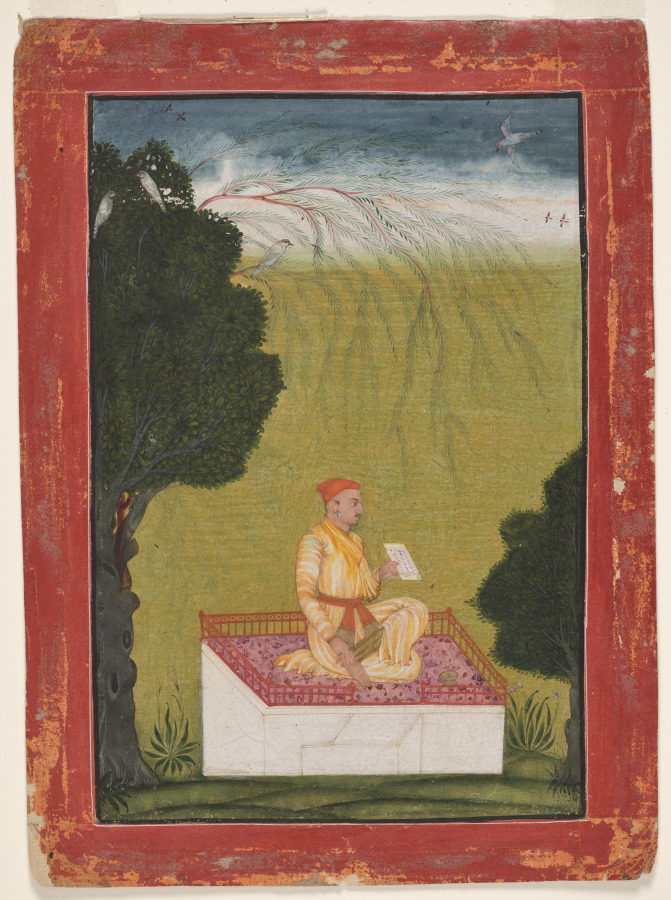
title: Raja Dilip Singh of Guler on a dais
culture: Northern India, Pahari kingdoms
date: c. 1707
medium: Gum tempera and gold on paper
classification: Painting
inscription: verso, in Takri: Shri Dalip Singh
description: Dilip Singh (reigned 1695–1741) holds a manuscript page with alternating lines of red and black ink, which may be a sacred text that announces his devotion to the Hindu god Vishnu, whose mark appears on his forehead. He inaugurated the practice of commissioning paintings and manuscripts for the royal collection at Guler. Some members of a family of artists of Guler had worked in the Mughal imperial workshop in Lahore in present-day Pakistan. They brought a vision of naturalism and delicate refinement evident in the trees, his facial features, Mughal-style belted tunic, and carpet with floral patterns.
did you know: He holds a manuscript, possibly referencing his court chronicle the Diliparanjani, completed in 1707.